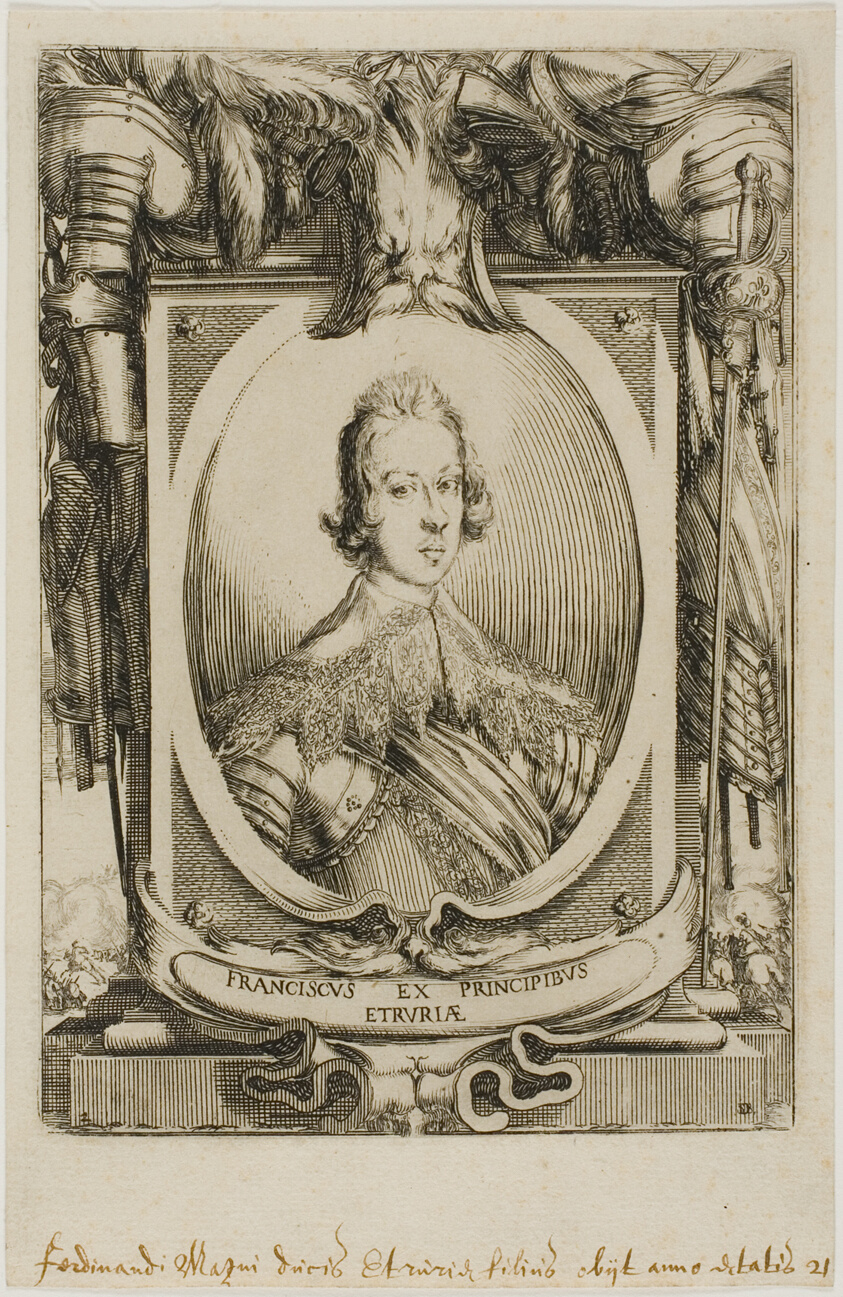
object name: Print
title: Francesco de Medici, Prince of Tuscany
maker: Stefano della Bella (Italian, 1610-1664)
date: 1634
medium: Etching and engraving on cream laid paper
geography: Italy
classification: etching; print; prints and drawing